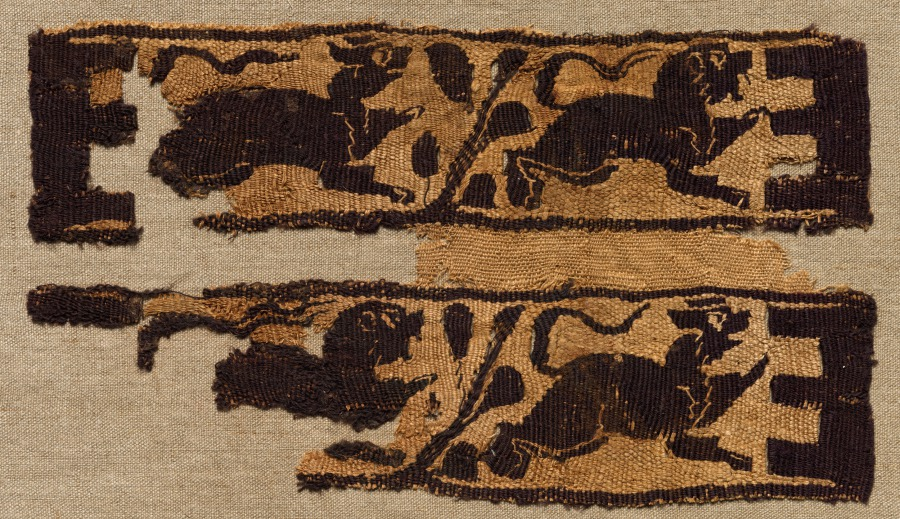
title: Fragment, Sleeve Ornament from a Tunic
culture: Egypt, Byzantine period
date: 500s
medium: tapestry (originally inwoven in tabby ground); linen and wool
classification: Textile